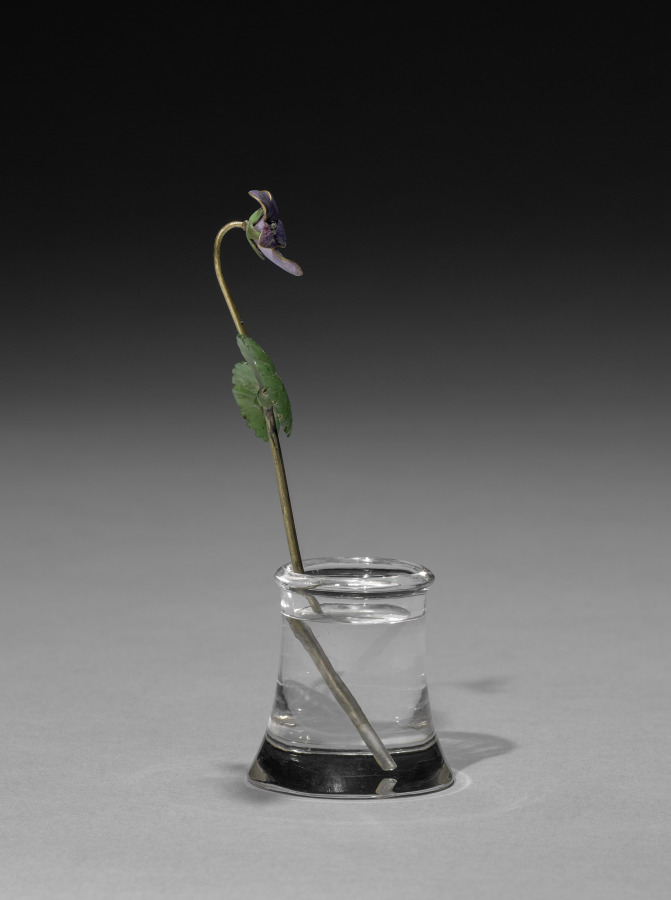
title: Flower Study of a Violet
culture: Russia, St. Petersburg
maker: House of Fabergé (Russian, 1842–1918)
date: c. 1885–1915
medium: enamel, silver gilt, jade, diamond, rock crystal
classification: Miscellaneous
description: This flower study depicts a single stem of violet. Fabergé’s inspiration for his flower studies is said to have come from the floral brooches of precious stones that were made in the 1700s for Catherine the Great as well as from the Japanese art of flower arranging, known as ikebana. Small and delicate, Fabergé’s flower studies were given as intimate gifts to friends by the tsarina and others in the court. She also liked to take them around to wherever the imperial family was residing as a reminder of spring during the harsh Russian winters.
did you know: The stems of Fabergé’s flower studies are set into little basins carved from rock crystal to resemble pots of water.